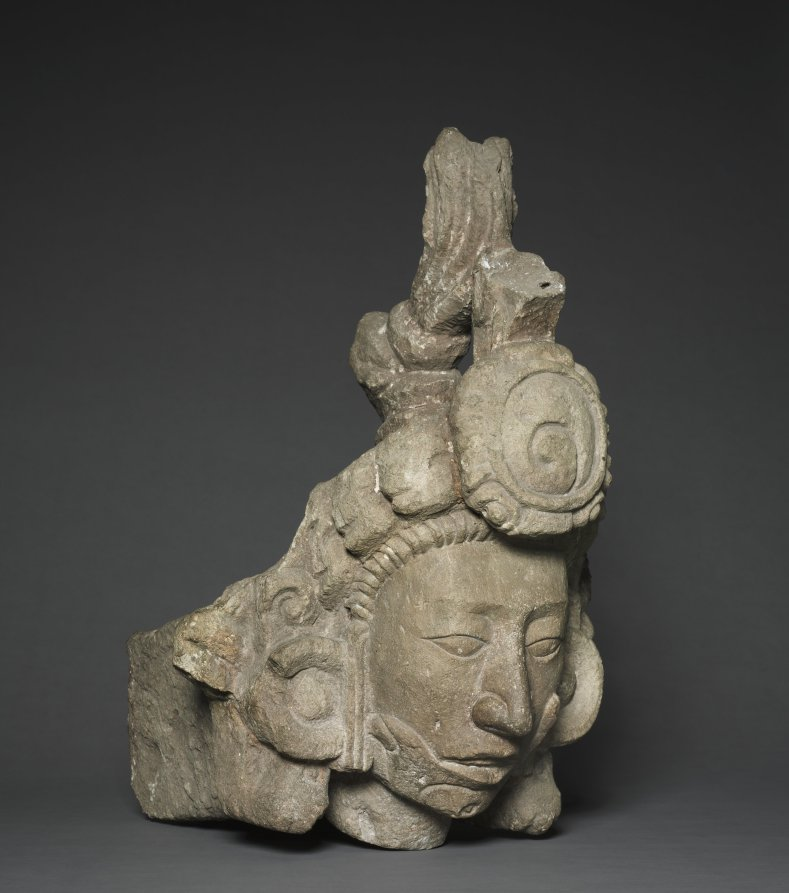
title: Head of a Young Noble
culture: Honduras, Copán, Structure 10L-22A, Maya style (250-900)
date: 746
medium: stone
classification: Sculpture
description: This young noble may be a political official of 8th-century Copán, an important site in eastern Maya territory. The noble, who embodies the Maya ideal of masculine beauty, wears circular ear ornaments and a headband, above which the tied hair rises. The meaning of the disembodied hand that cups the chin is debated. The head, collected by Harvard archaeologists in the 1890s, comes from the facade of a building may have been used as a council house by a Copán ruler and his advisors during a crisis that rocked the city’s ruling dynasty. On the structure’s upper level, above woven mat signs that symbolized political authority, eight figures were enthroned in T-shaped recesses. This head is from one of these figures. Beneath each recess was a hieroglyph thought to name an important town (or family) within Copán’s domain. The figures may represent these towns’ advisors to the king, whose image crowned the structure.